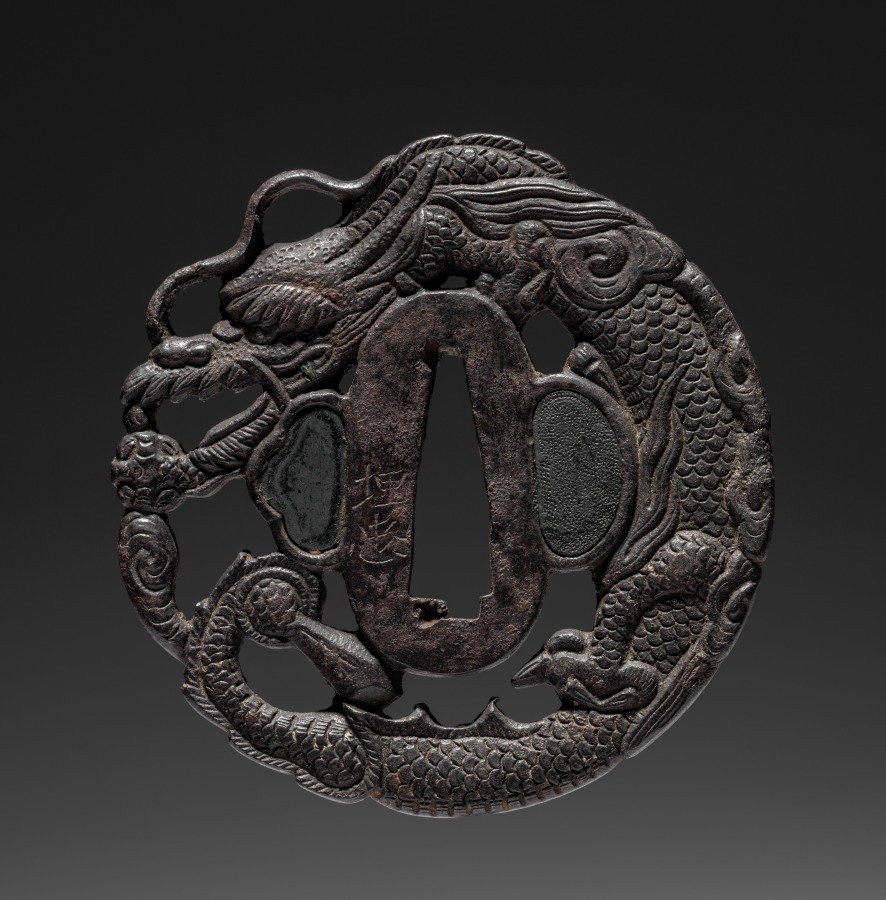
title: Sword Guard (Tsuba) with Dragon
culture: Japan, possibly Edo period (1615-1868)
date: c. 1615–1868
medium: iron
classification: Arms and Armor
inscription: signed: 山城國西陣住埋忠